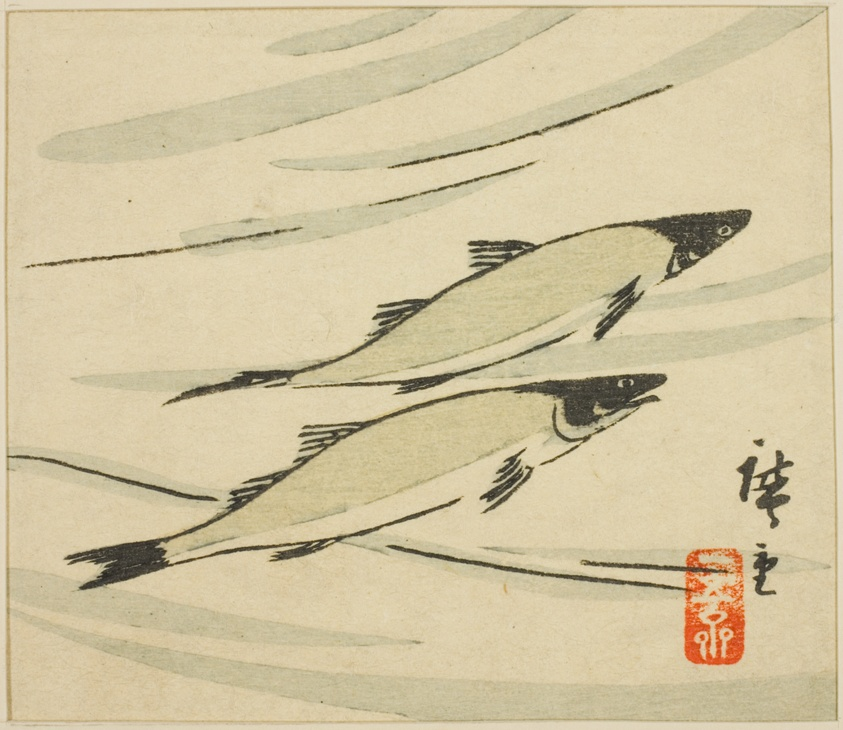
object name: Print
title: Trout, section of a harimaze sheet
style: Japanese (culture or style)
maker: Utagawa Hiroshige 歌川 広重; Japanese, 1797-1858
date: 1858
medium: Color woodblock print; section of harimaze sheet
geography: Japan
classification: woodblock print; print; asian art